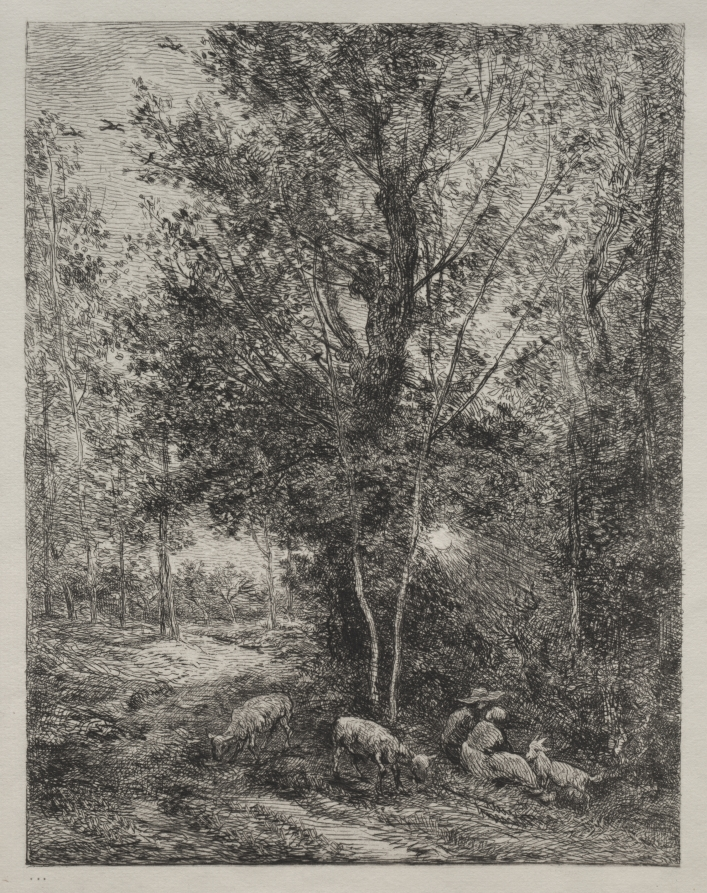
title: The Shepherd and the Shepherdess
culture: France, 19th century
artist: Charles François Daubigny (French, 1817–1878)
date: 1874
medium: etching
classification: Print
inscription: signed, lower right, in pencil: C. F. Daubigny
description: Although etching had fallen into disfavor in France, Daubigny began to produce original etchings in the 1840s. The revival of this technique began to accelerate, and in 1862 the Société des Aquafortistes (Society of Etchers) was organized by Alfred Cadart, who was instrumental in publishing many albums of prints. In addition, periodicals such as L'Artiste (The Artist) included original etchings, which also helped to generate interest in the medium. The countryside around Barbizon (a village about 30 miles southeast of Paris) provided a refuge from the urbanization and industrialization of modern life and offered landscape etchers a vast array of scenery—from wild forest to rocky gorges. Daubigny, who wanted to retain the immediacy of the direct observation of nature, used a flat-bottomed boat as a floating studio on the rivers of France in order to capture the momentary effects of light and atmosphere.